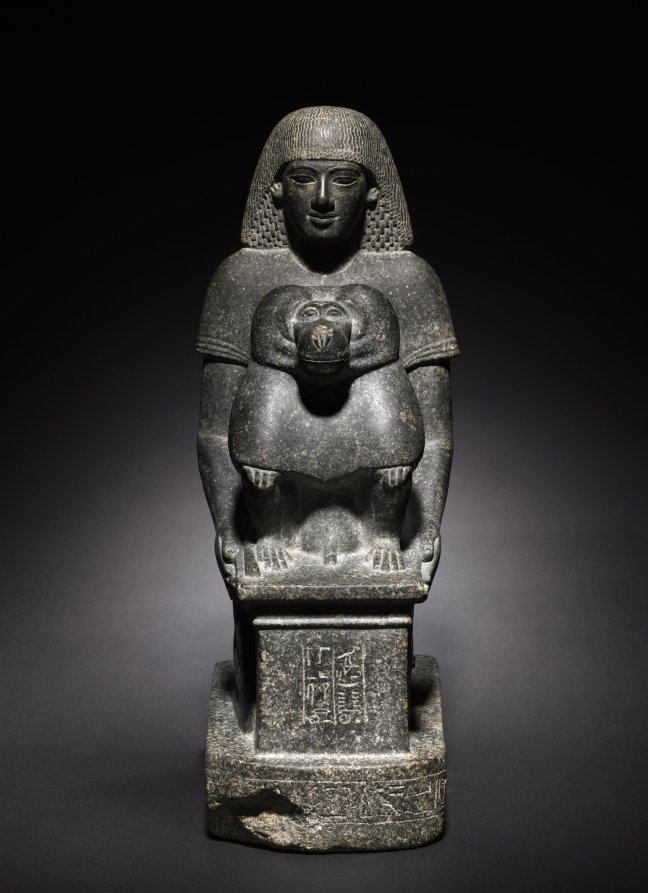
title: Statue of Minemheb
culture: Egypt, New Kingdom (1540–1069 BCE), Dynasty 18, reign of Amenhotep III (1390–1352 BCE)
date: c. 1391–1353 BCE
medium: granodiorite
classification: Sculpture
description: Minemheb was one of the many court officials who helped prepare for Amenhotep III's 30-year jubilee festival. Clearly, Minemheb regarded this as the high point of his career, since his title as chief of construction for the jubilee temple is the primary one provided on this statue. It is actually a statue within a statue: Minemheb kneels to present a small altar, upon which squats a statue of the god Thoth in baboon form. Carved in extremely hard stone, Minemheb's statue is nonetheless carefully detailed and superbly modeled. Special attention was given to the rendering of the baboon's face. The heavy-lidded eyes and furrowed brow give the animal an almost contemplative expression.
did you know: The baboon in this sculpture is the god Thoth in one of his animal forms.